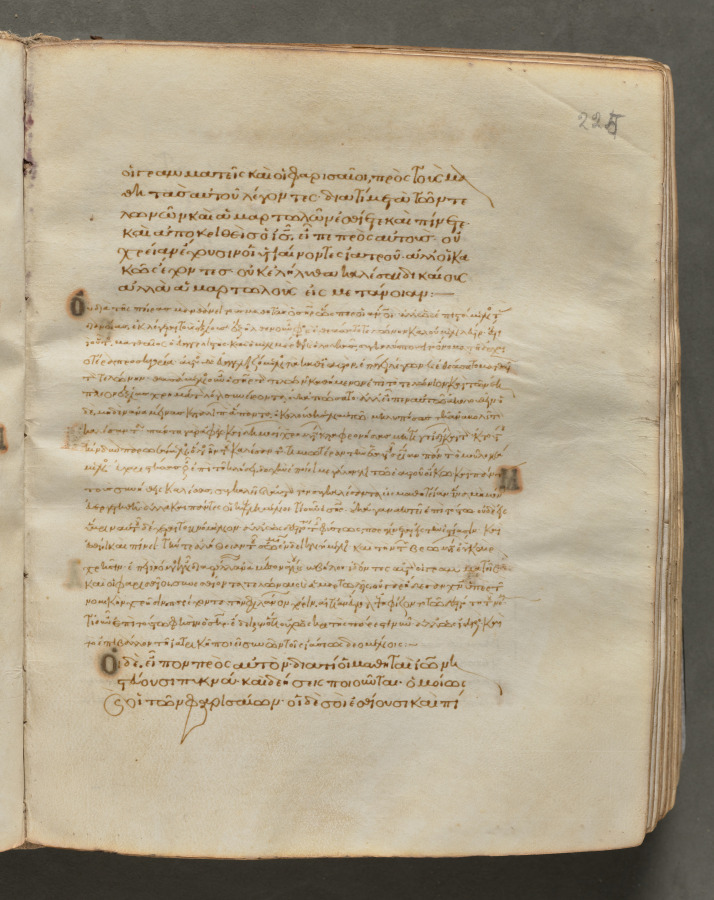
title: Text, folio 225 (recto), from a Gospel Book with Commentaries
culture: Byzantium, Constantinople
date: c. 1000–1100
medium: ink, tempera, and gold on vellum; leather binding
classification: Bound Volume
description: Each of the four gospels in this book opens on a page with brilliantly illuminated borders depicting the author of the text as well as birds-principally peacocks, symbols of the immortality of the soul-and fountains, representing the fountain of life and the salvation of the soul. This volume consists of 428 leaves with texts in Greek. Its level of sophistication suggests that it was probably written and decorated in a monastery in Constantinople.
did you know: Gospel Books were carried in procession through Byzantine churches.